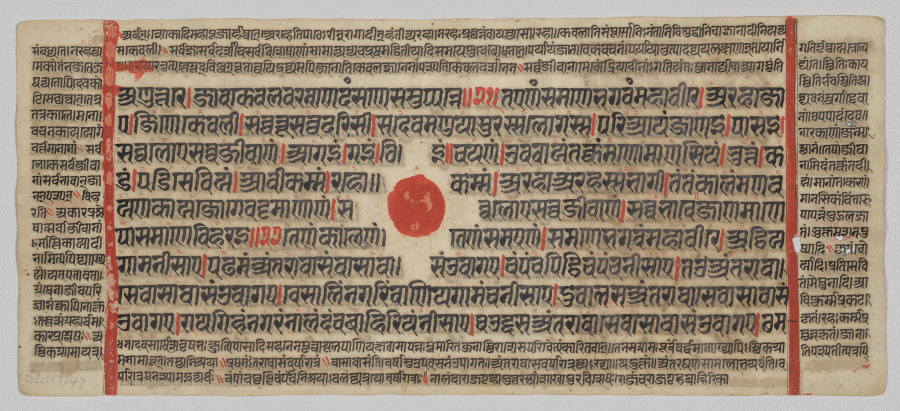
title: Text, Folio 40 (recto), from a Kalpa-sutra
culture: Western India, Gujarat, last quarter of the 15th century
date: c. 1475–1500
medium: Gum tempera, ink, and gold on paper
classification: Painting